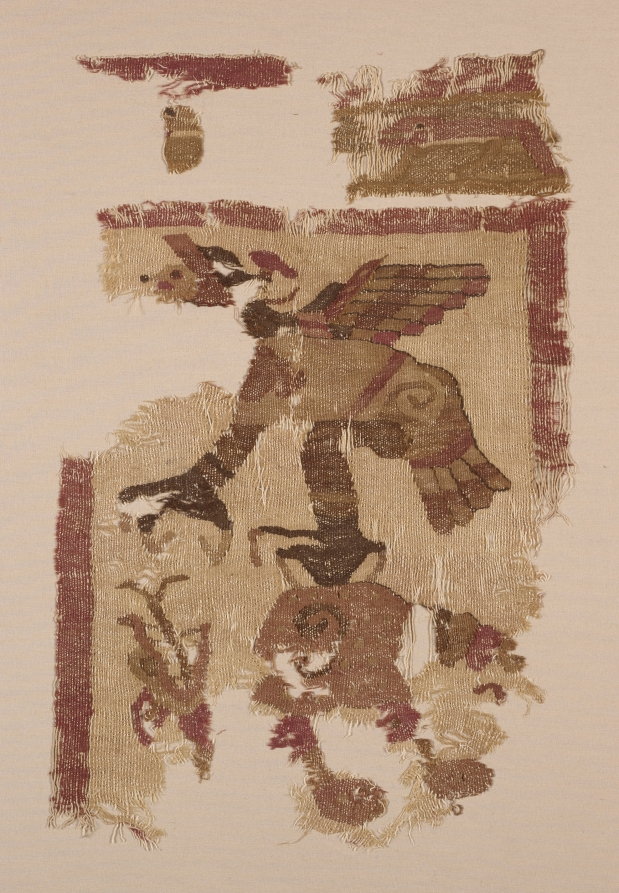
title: Textile Fragment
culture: Peru, Moche, north coast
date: c. 50–650 CE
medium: cotton and camelid fiber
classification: Textile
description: This fragment, one of several in the collection, is a rare survivor of catastrophic rains that destroyed much of the Moche textile legacy and may have helped to bring about the decline of Moche culture. It depicts a serpent and a snail beneath a hovering raptorial bird—perhaps a snail kite, a type of hawk named after its favored food. The size of the motifs implies that the original textile was large; a mantle (a shawl-like garment) or a hanging are among the possibilities.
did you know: This fragment is a rare survivor of floods that destroyed much of the Moche textile record.